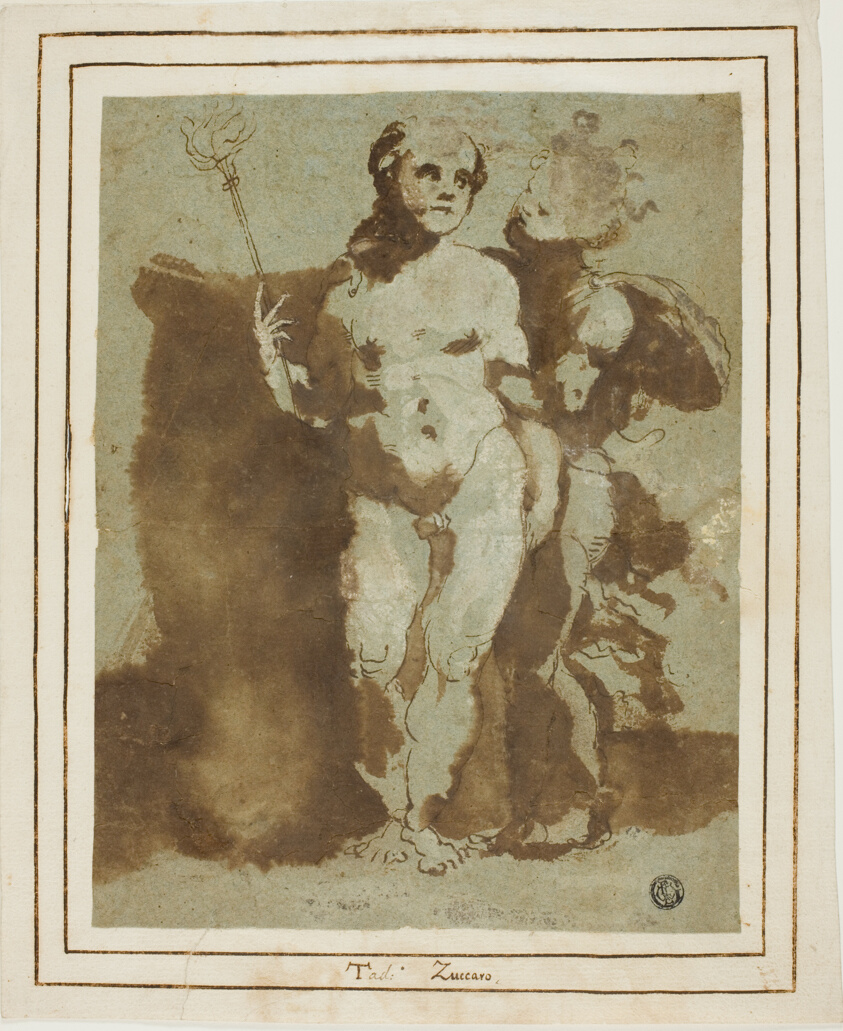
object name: Drawing and Watercolor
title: Pagan Child Couple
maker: Circle of Domenico Beccafumi, called Il Mecarino (Italian, 1484-1551); or Marco Pino (Italian, c. 1525-1587/88); or Taddeo Zuccaro (Italian, 1529-1566)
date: c. 1546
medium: Pen and brown ink with brush and brown wash, heightened with lead white (partly oxidized), on blue-gray laid paper, laid down on ivory laid paper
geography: Italy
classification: ink with wash; drawings (visual works); prints and drawing